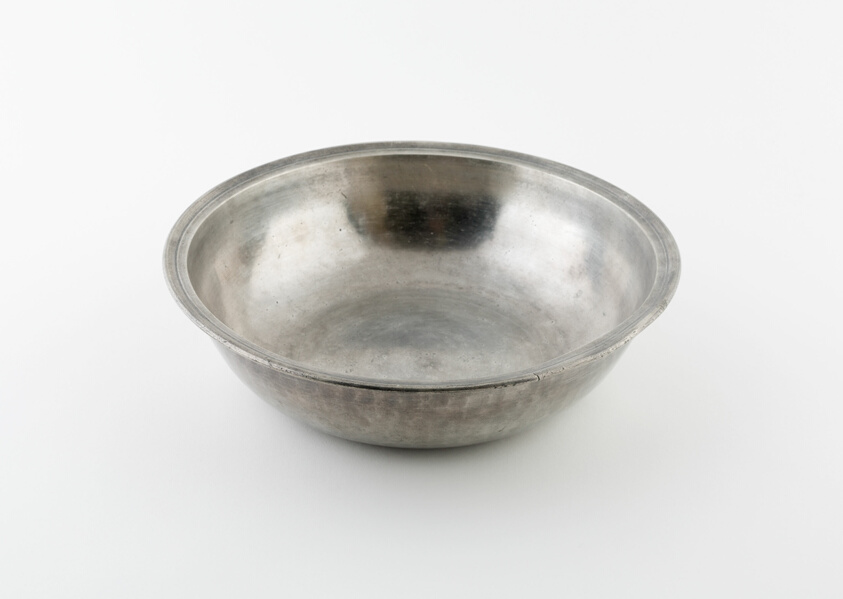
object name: Metalwork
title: Basin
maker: Townsend and Compton; English, active 1784-1801; England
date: c. 1790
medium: Pewter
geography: London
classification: pewter; metalwork; european decorative arts